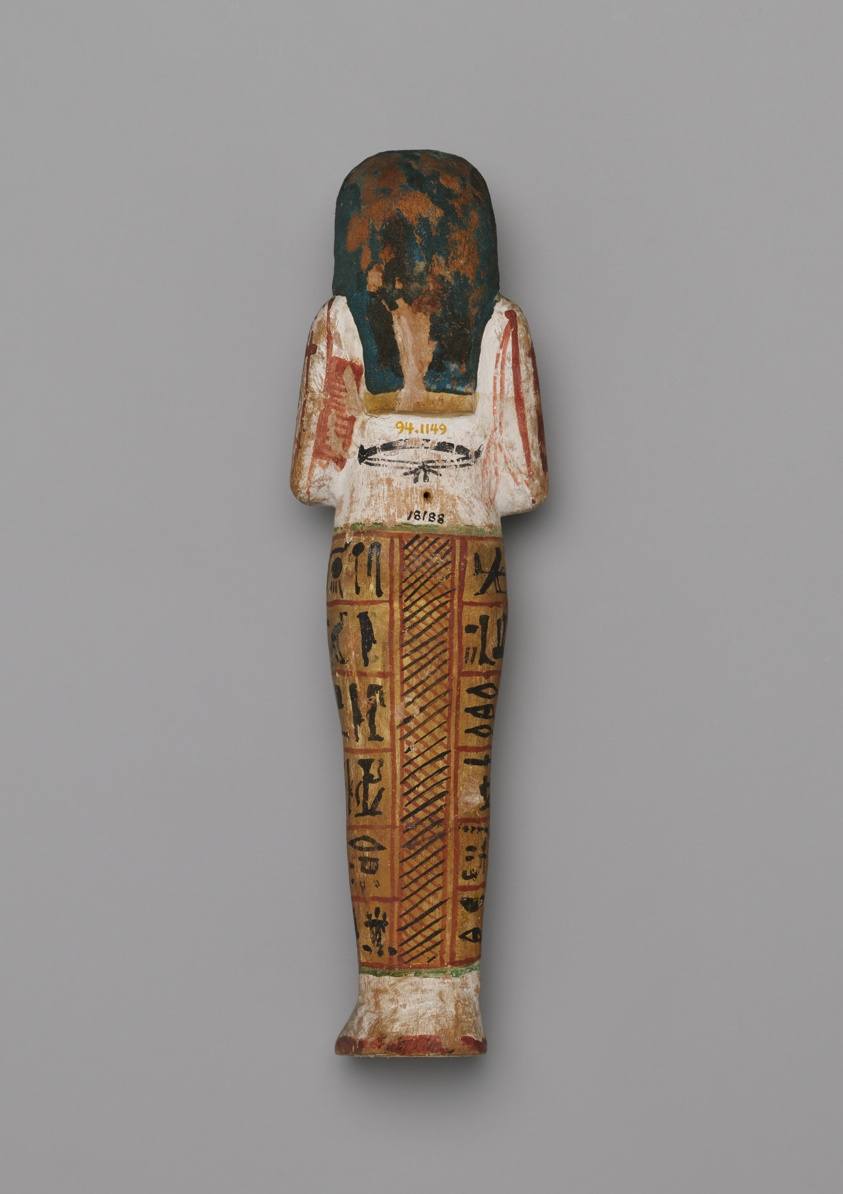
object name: Funerary Object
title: Shabti (Funerary Figurine) of Mayat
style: new kingdom, ancient, egyptian, nineteenth dynasty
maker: Egyptian; probably Thebes (modern Luxor), Egypt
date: New Kingdom, Dynasty 19 (about 1295–1186 BCE)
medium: Wood, gesso, and pigment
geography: Egypt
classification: ushabti; wood; funerary; figurine; ancient art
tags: funerary art, Hieroglyphs, mummies, women